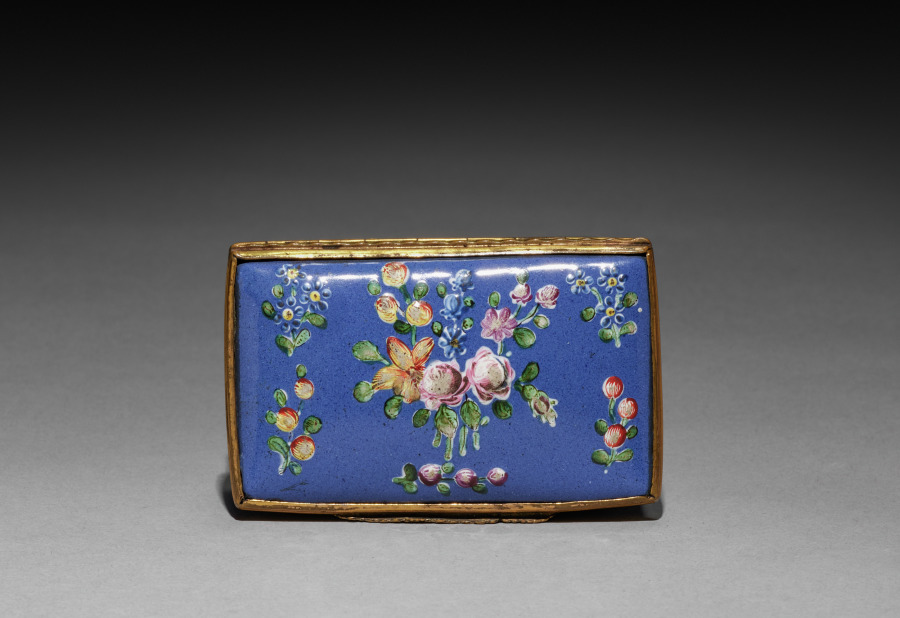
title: Snuff Box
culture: Germany ?, 19th century (?)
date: 1800s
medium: enamel on copper with metal mounts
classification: Miscellaneous